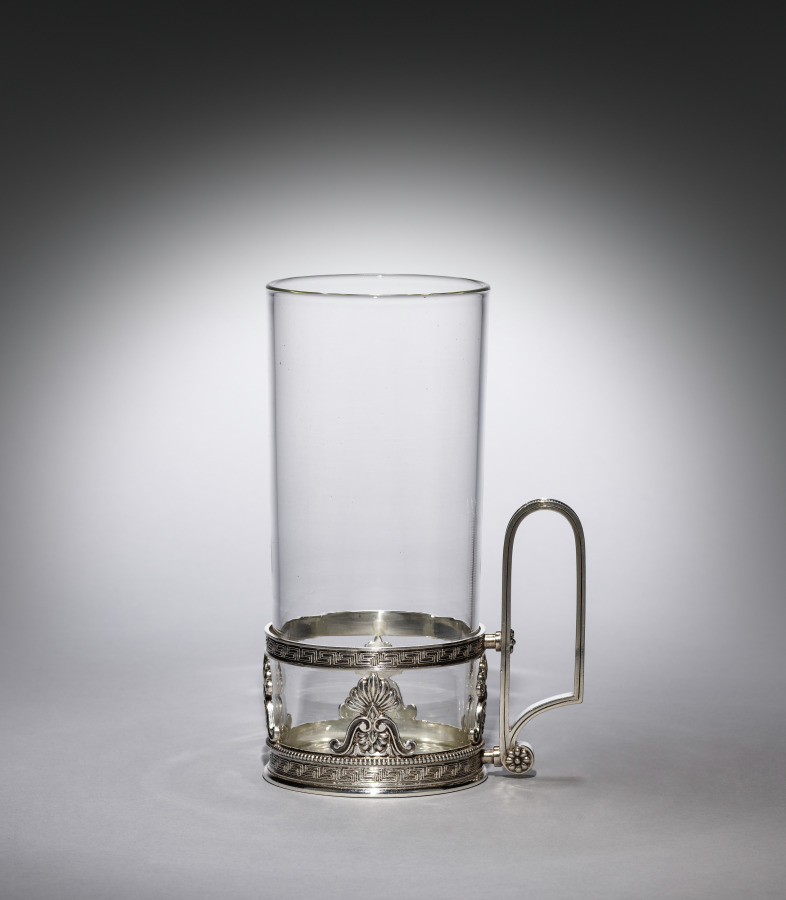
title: Tea Cup and Holder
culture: Russian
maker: House of Fabergé (Russian, 1842–1918)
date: 1908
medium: silver, glass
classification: Glass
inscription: Дорогому А. В. Вержбилович Признательный Митя Шагинъ 19 I/III 08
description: Fabergé drew upon different historical styles and applied them to the same object type with a consistently high level of finesse. The holder for this tea glass incorporates a range of classicizing ornamental designs from the turn of the nineteenth century, such as the Greek key pattern on the horizontal bands and the intermittent palmettes.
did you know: The history of the palmette, a motif resembling fan-shaped palm leaves, can be traced back to ancient Egypt.